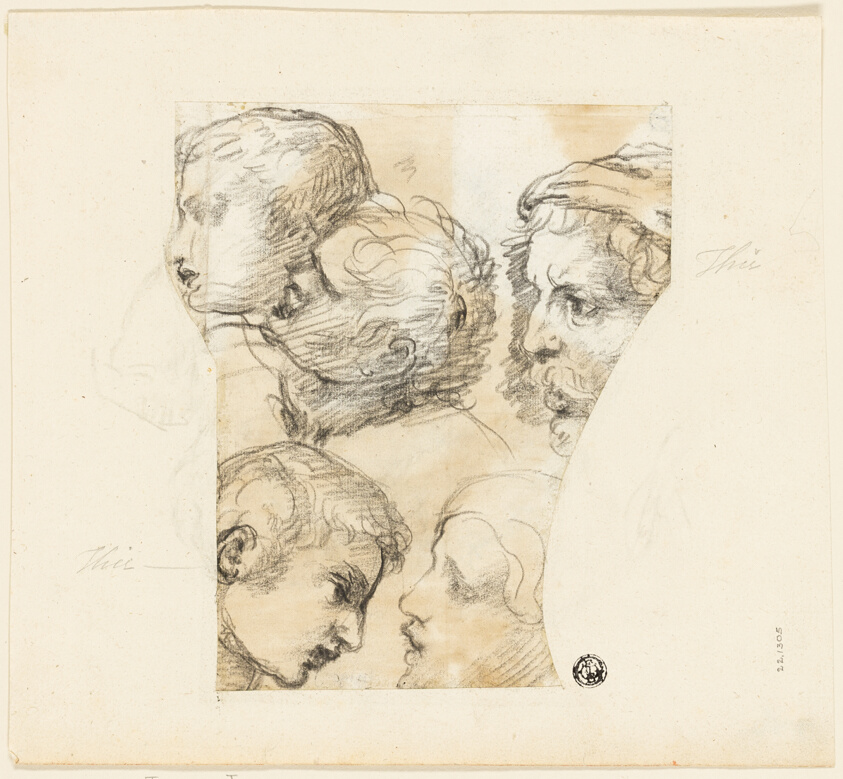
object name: Drawing and Watercolor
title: Sketches of Male Heads (recto); Two Old Women (verso)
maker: Thomas Patch (English, 1725-1782); or Inigo Jones (English, 1573-1652)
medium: Black chalk (recto and verso) on ivory laid paper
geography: England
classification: chalk; drawings (visual works); prints and drawing